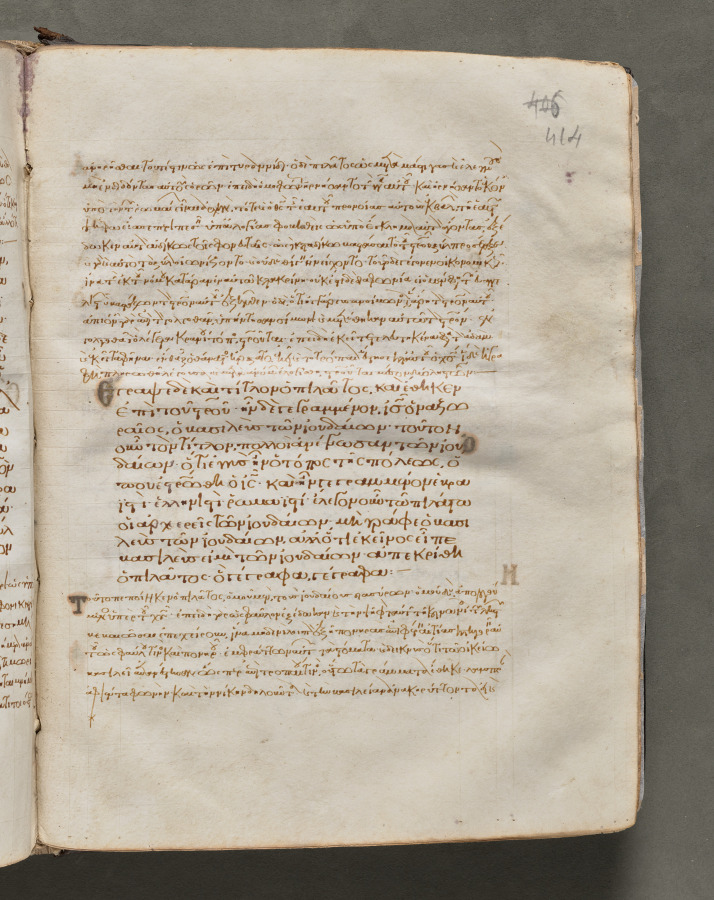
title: Text, folio 414 (recto), from a Gospel Book with Commentaries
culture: Byzantium, Constantinople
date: c. 1000–1100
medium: ink, tempera, and gold on vellum; leather binding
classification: Bound Volume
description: Each of the four gospels in this book opens on a page with brilliantly illuminated borders depicting the author of the text as well as birds—principally peacocks, symbols of the immortality of the soul—and fountains, representing the fountain of life and the salvation of the soul. This volume consists of 428 leaves with texts in Greek. Its level of sophistication suggests that it was probably written and decorated in a monastery in Constantinople.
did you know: Gospel books were carried in procession through Byzantine churches.